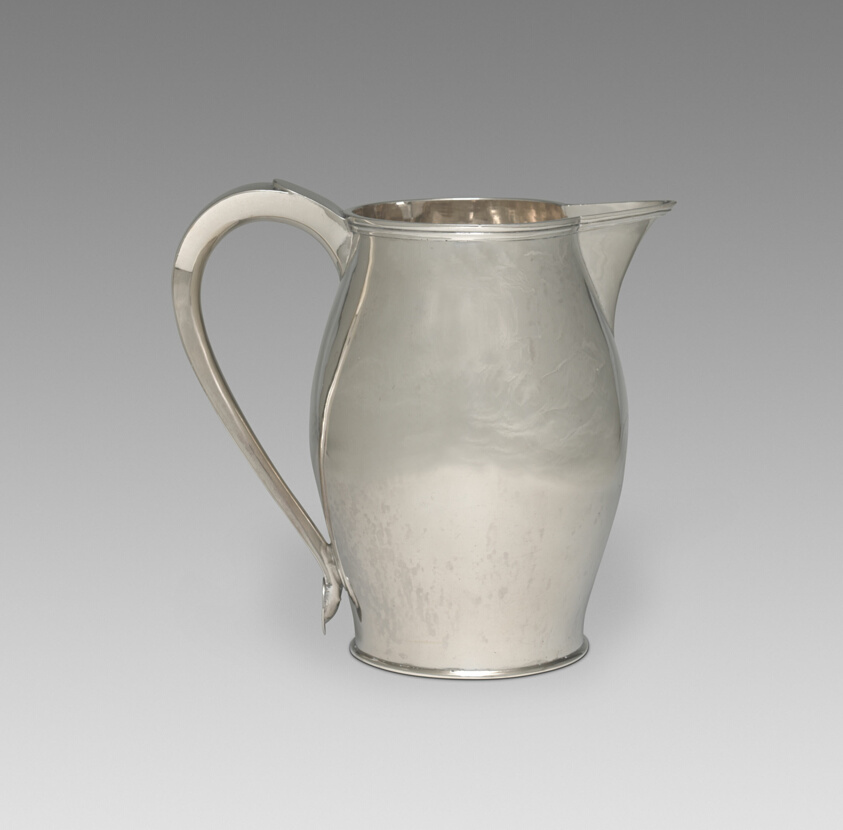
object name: Metalwork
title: Pitcher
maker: Ebenezer Noyes Moulton; American, 1768–1824; Boston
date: 1801–10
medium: Silver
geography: Boston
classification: pitcher (vessel); vessel; silver; american decorative arts; american arts; decorative arts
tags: dining, drinking